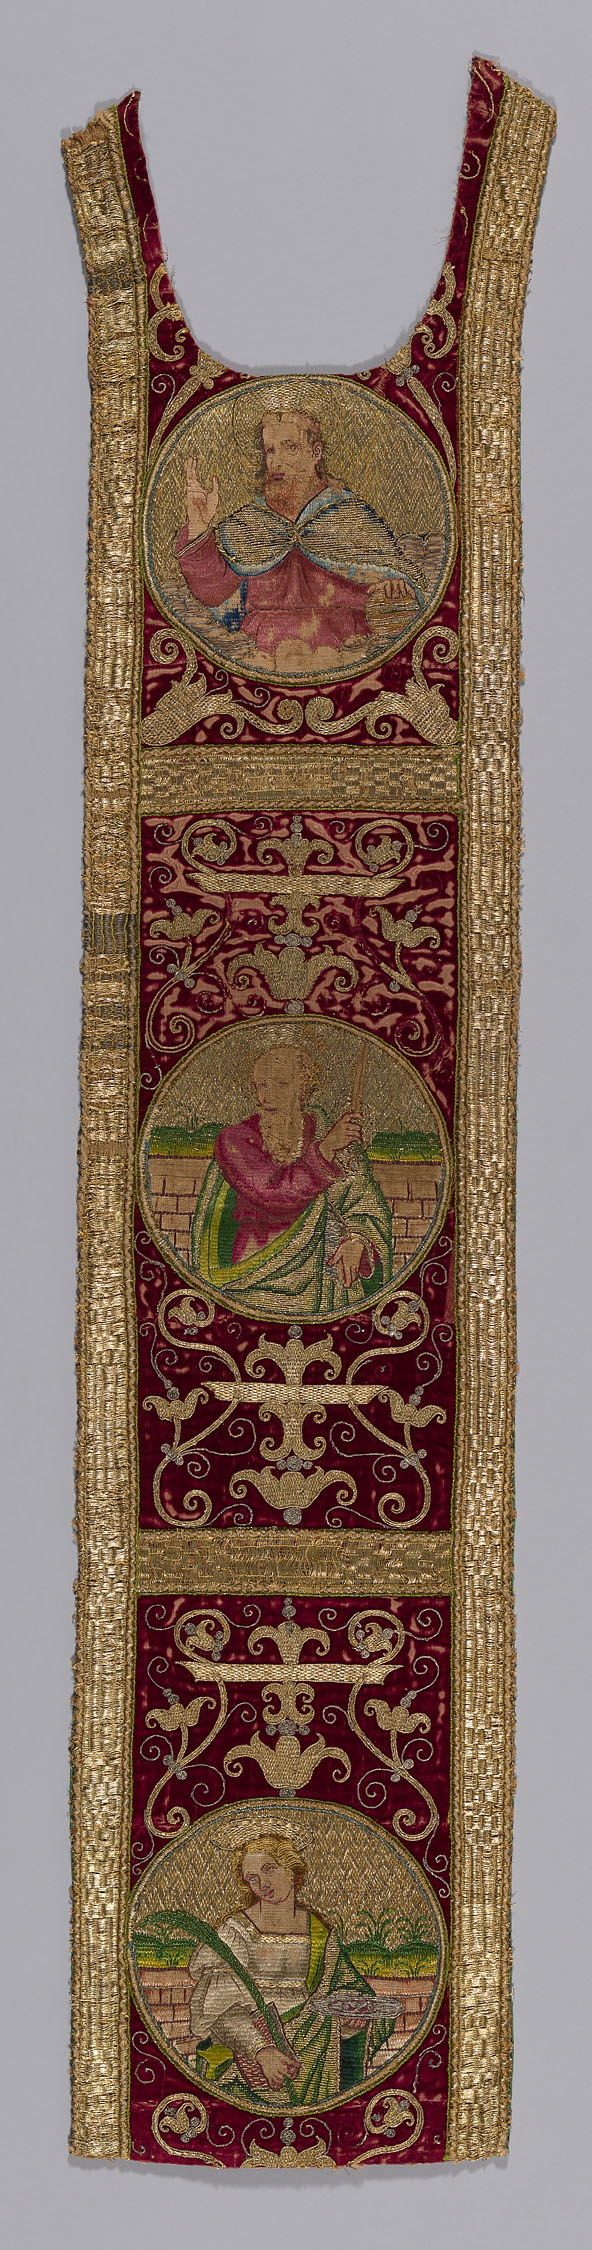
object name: Religious/Ritual Object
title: Orphrey Band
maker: Italy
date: 17th century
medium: Hemp and linen plain weave; appliquéd with silk, broken warp chevron twill weave cut, solid velvet; embroidered with silk and gilt- and silvered-metal-strip-wrapped silk in satin and split stitches; laidwork, couching padded couching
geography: Italy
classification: textile; weaving - velvet; liturgical; needlework (visual works); ritual objects